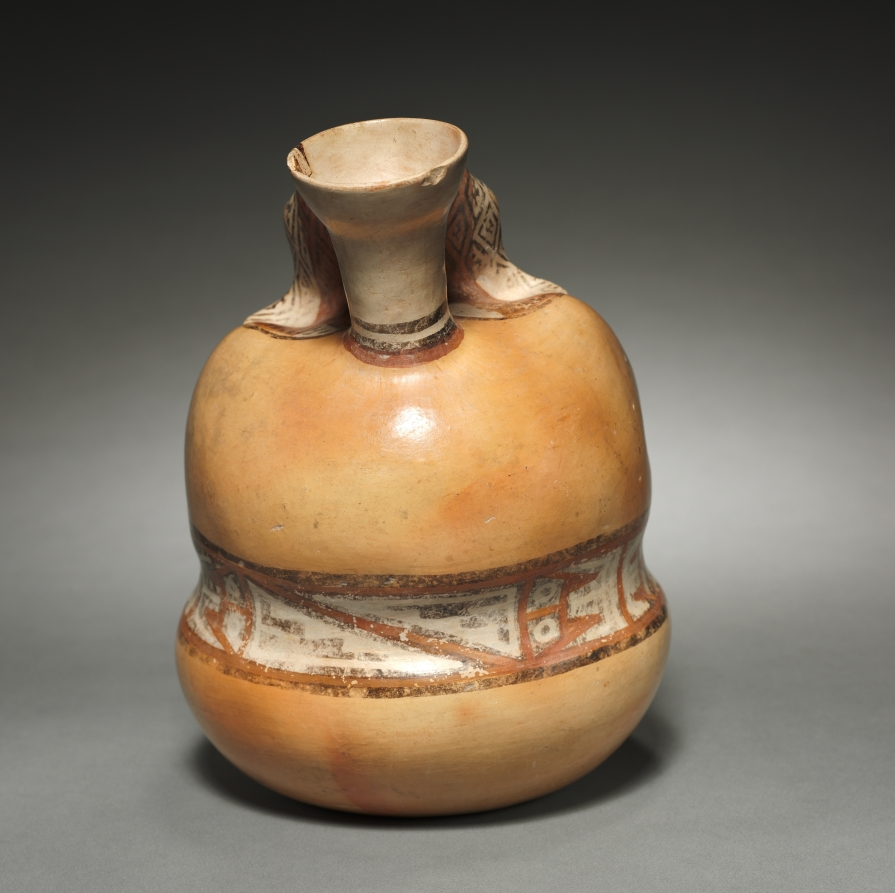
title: Mother-and-Child? Vessel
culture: Central Andes, North Highlands, Recuay people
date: 1–700 CE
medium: ceramic, slip, pigment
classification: Sculpture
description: Well-dressed, important women like this one are depicted fairly often in Recuay art. These women hold a variety of things, ranging from cups that may refer to feasts held on important political occasions to small figures commonly interpreted as children, as here. These and other representations have led scholars to suggest that Recuay women held authority independent of their male partners; their authority may have stemmed in part from involvement in feasting celebrations.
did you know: Recuay ceramics typically use only three colors: black, white, and red.